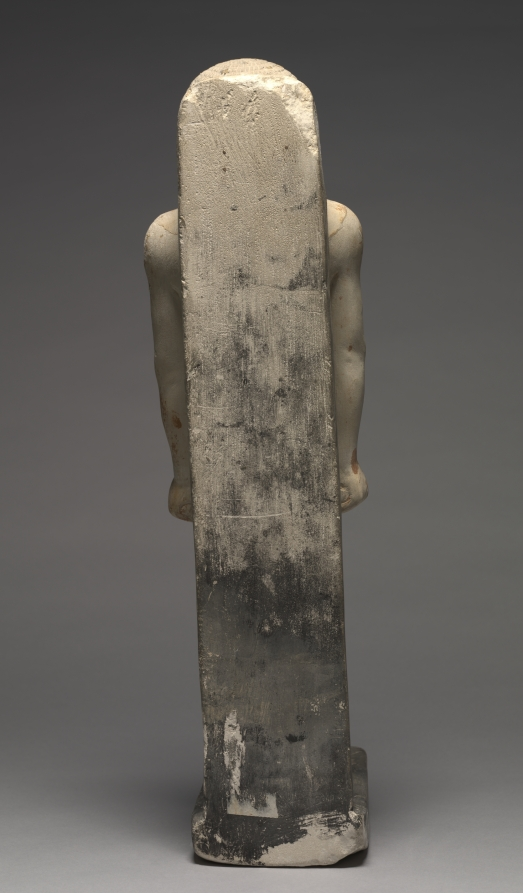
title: Striding Statue of Minnefer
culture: Egypt, Giza, Old Kingdom (2647–2124 BCE), Dynasty 5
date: c. 2377–2311 BCE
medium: painted limestone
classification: Sculpture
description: The base of this statue is inscribed with the name and title of the supervisor of palace attendants, Minnefer. He is represented as young and athletic, hands at his sides and left foot forward, the typical striding pose for male figures. To make the statue more lifelike, the flesh areas were originally painted reddish brown, the wig black, and the kilt white. This was one of four statues of Minnefer that were found in the serdab (sealed statue chamber) of his ruined mastaba (tomb) in the cemetery west of the Great Pyramid at Giza. Most Old Kingdom private statues were concealed in this way. The statue was regarded as more than just a representation. Once the proper rites had been performed, it functioned as a substitute for the deceased individual and could partake of food offerings necessary for the survival of his ka, or vital spirit.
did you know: In the Old Kingdom, wigs like the one Minnefer wears here were used to demonstrate higher social status.